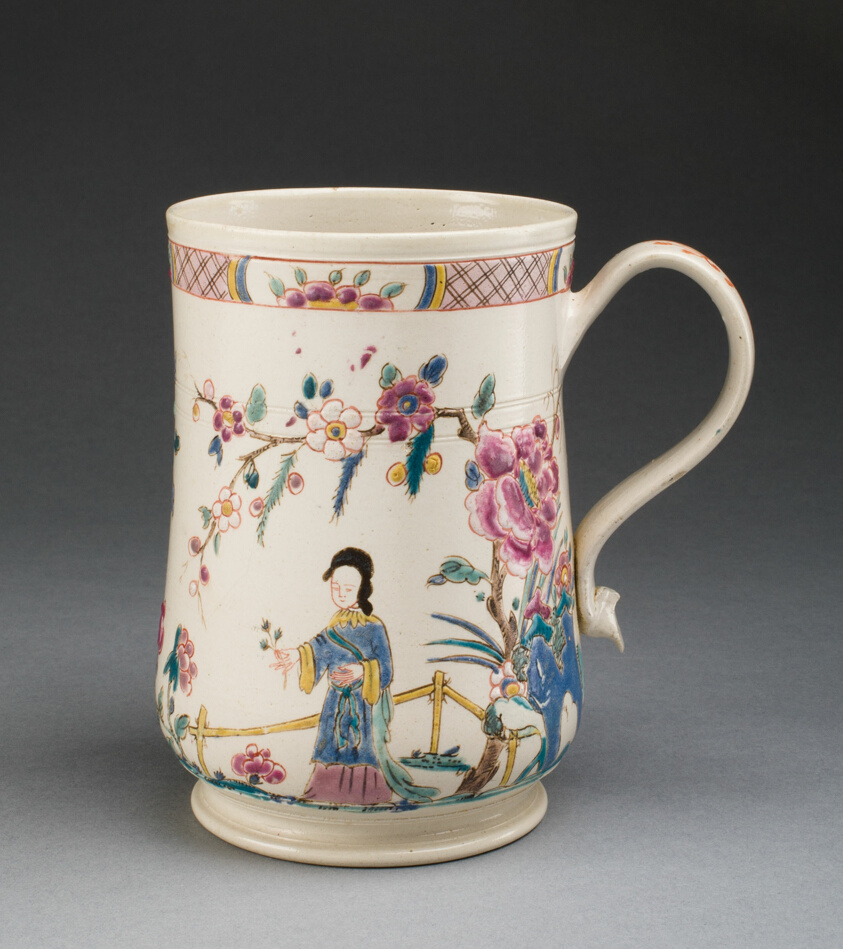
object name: Ceramics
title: Tankard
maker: Staffordshire, England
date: c. 1760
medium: Salt-glazed stoneware, polychrome enamels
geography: Staffordshire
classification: drinking vessel; stoneware; ceramics; european decorative arts; salt-glazed stoneware